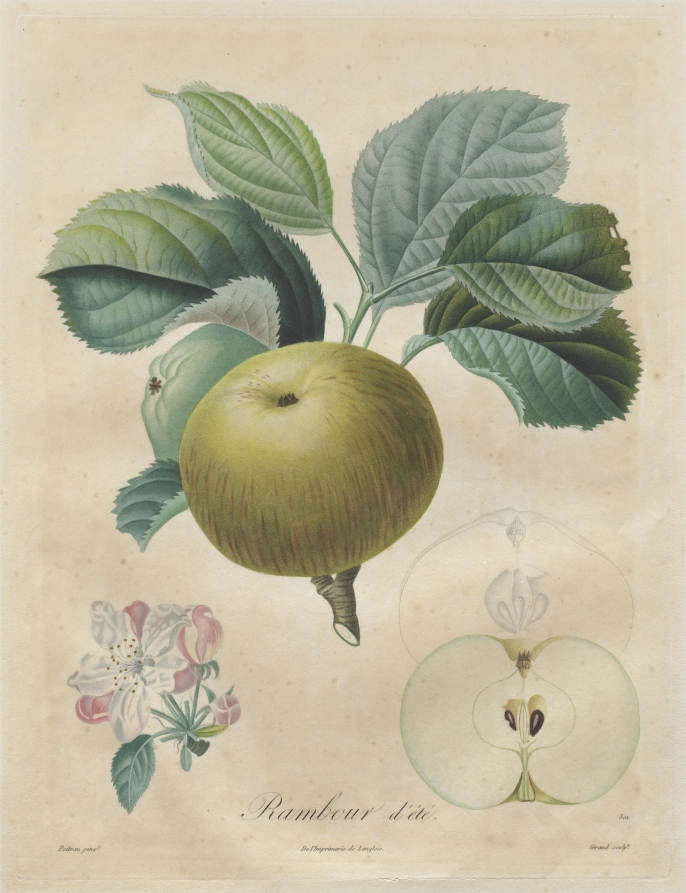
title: Traité des arbres fruitiers: Rambour d'été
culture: France, 19th century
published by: Henri Louis Duhamel du Monceau (French, 1700–1782)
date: 1808–1835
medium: stipple and line engraving, with hand coloring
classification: Print